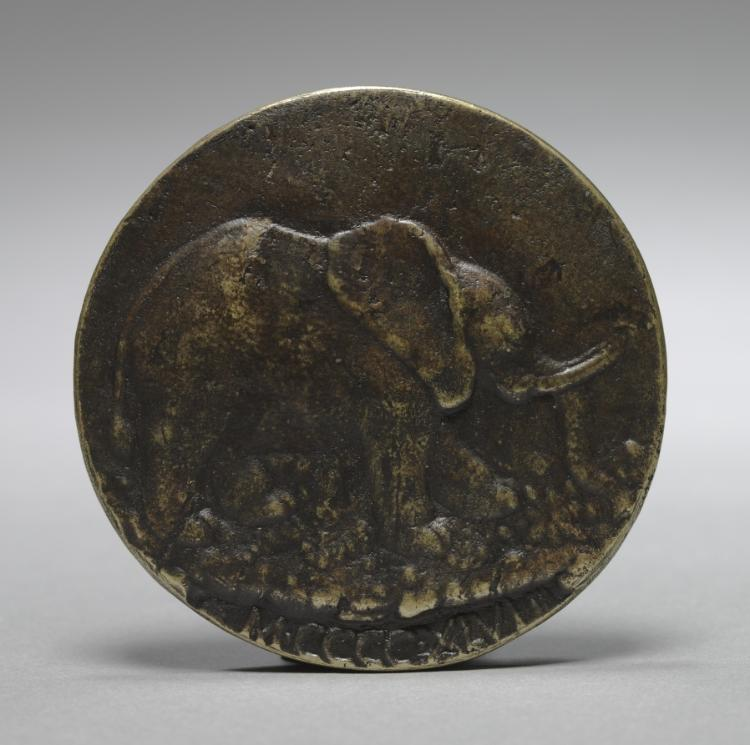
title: Medal of Isotta degli Atti da Rimini (reverse)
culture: Italy, 15th century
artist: Matteo de' Pasti (Italian, 1420–1467/68)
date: 15th century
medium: bronze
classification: Sculpture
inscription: reverse: "MCCCCXLVI"